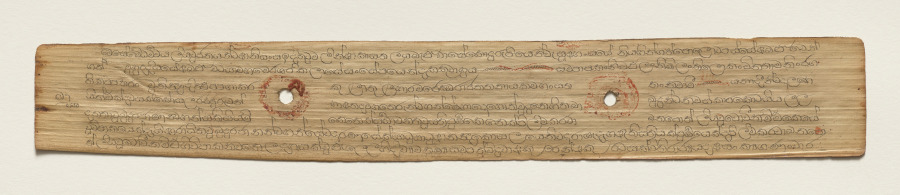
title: Leaf from a Buddhist Manuscript (recto)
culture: Sri Lanka, Singhalese, Late 17th century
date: c. 1700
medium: fiber paper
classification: Manuscript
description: Palm leaf material is still used for manuscripts in Sri Lanka. The palm leaves are prepared first by boiling them, drying them in the sun, and then rubbing them with oils. Scribes then use a metal stylus to incise the text. Then charcoal powder is wiped across the pages, filling in only the inscribed lines.